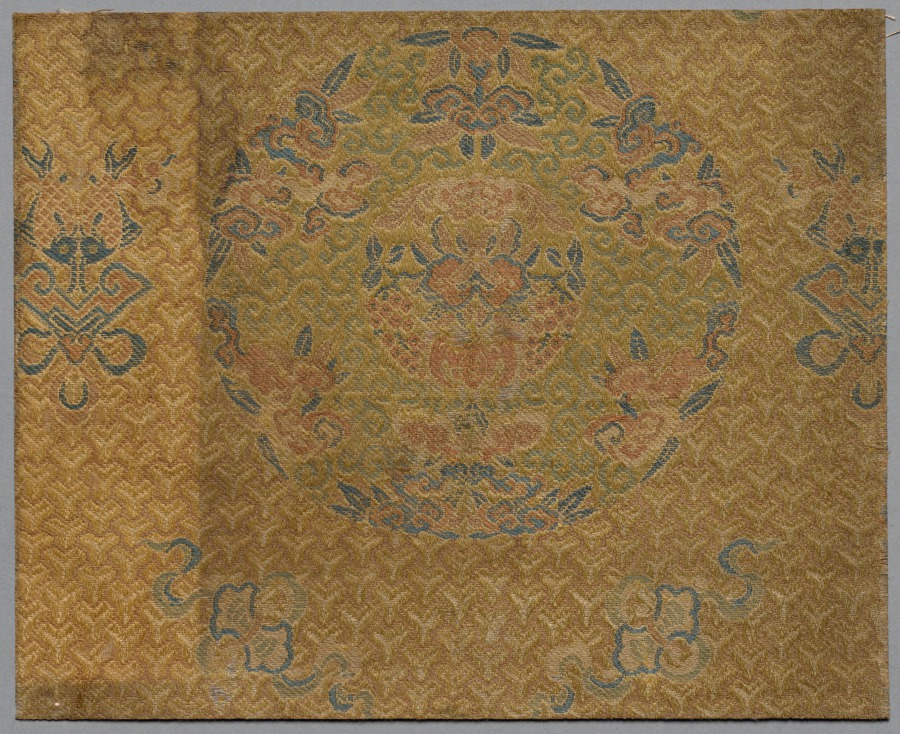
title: Fragment from Book of Textiles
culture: China, Qing dynasty (1644-1911)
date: 1800s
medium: silk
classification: Textile